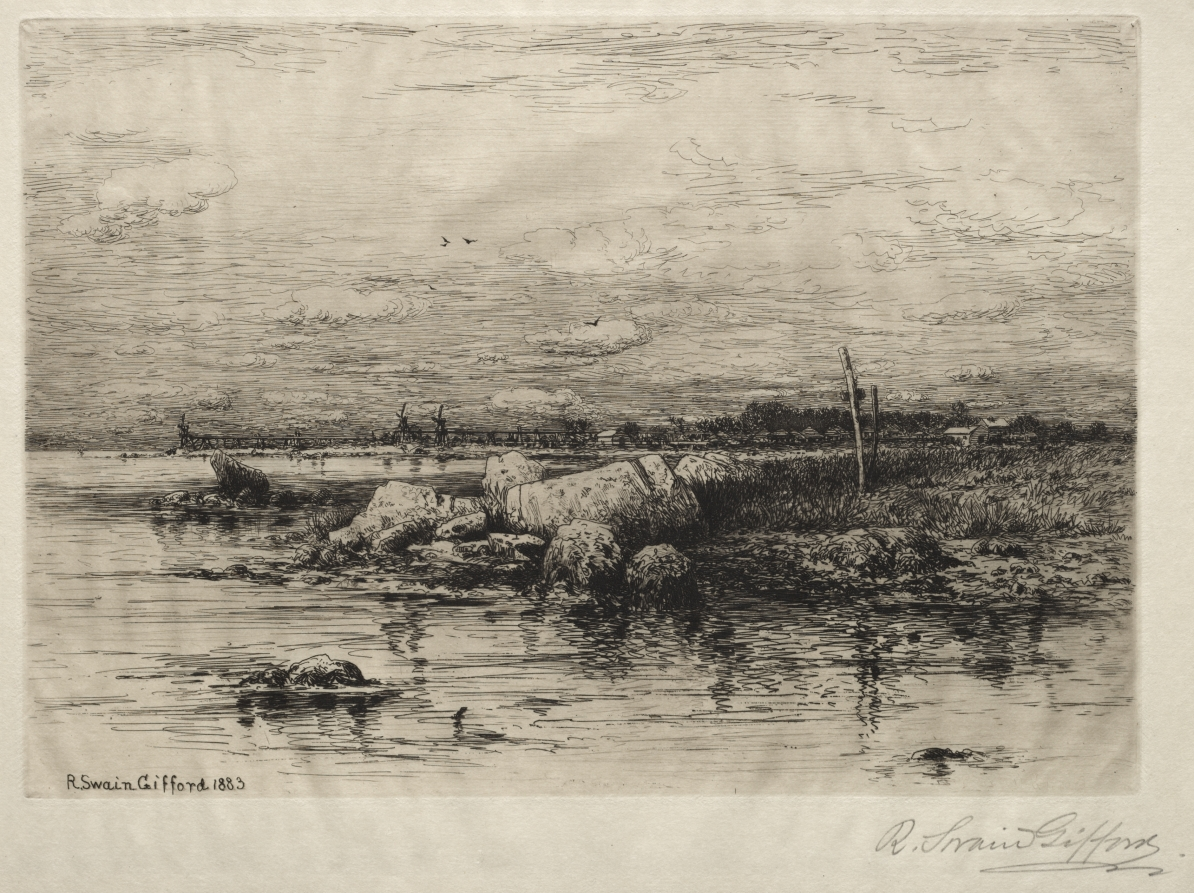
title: The Mouth of the Apponigansett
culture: America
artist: Robert Swain Gifford (American, 1840–1905)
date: 1883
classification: Print